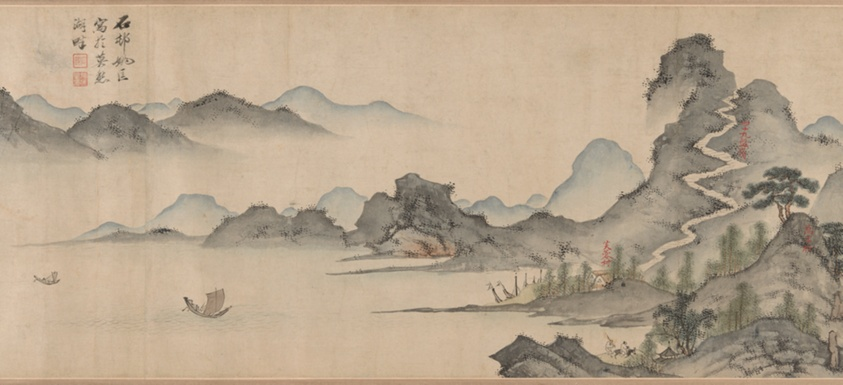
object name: Painting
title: Famous Scenes of Yandang Mountain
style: Chinese (culture or style)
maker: Yao Kuang 姚匡; Chinese, active 17th century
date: Qing dynasty (1644–1911), 17th–century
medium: Handscroll; ink and colors on paper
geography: China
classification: scroll; painting